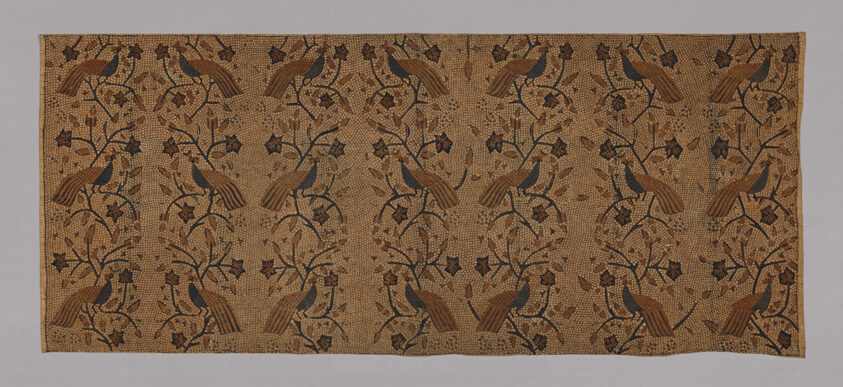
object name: Costume and Accessories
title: Sarong (Part of Sarong)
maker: Indonesia, Java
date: 19th century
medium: Batik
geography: Java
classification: textile; weaving - printed; weaving; costume; dress (garment); clothing